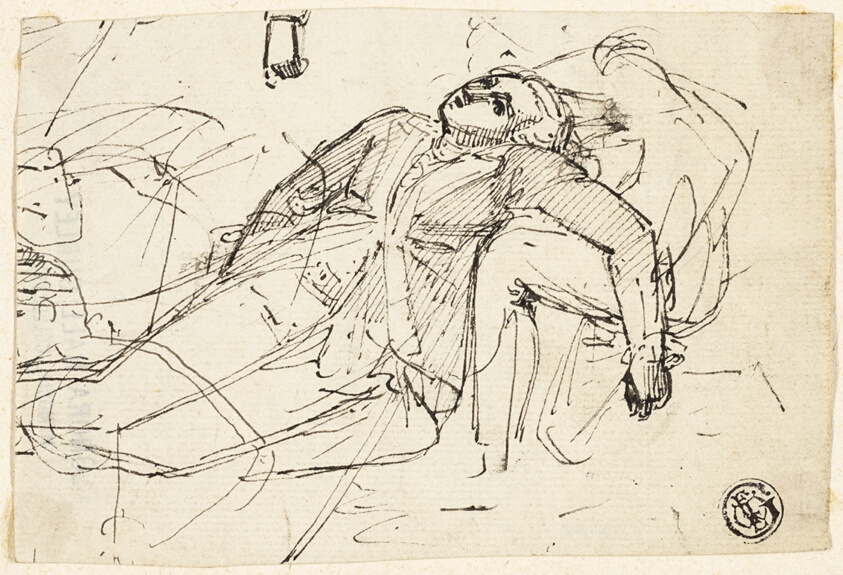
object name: Drawing and Watercolor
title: The Death of General Wolfe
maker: Attributed to Benjamin West; American, 1738-1820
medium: Pen and black ink on ivory laid paper, tipped onto ivory wove paper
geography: United States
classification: pen and ink drawings; drawings (visual works); prints and drawing